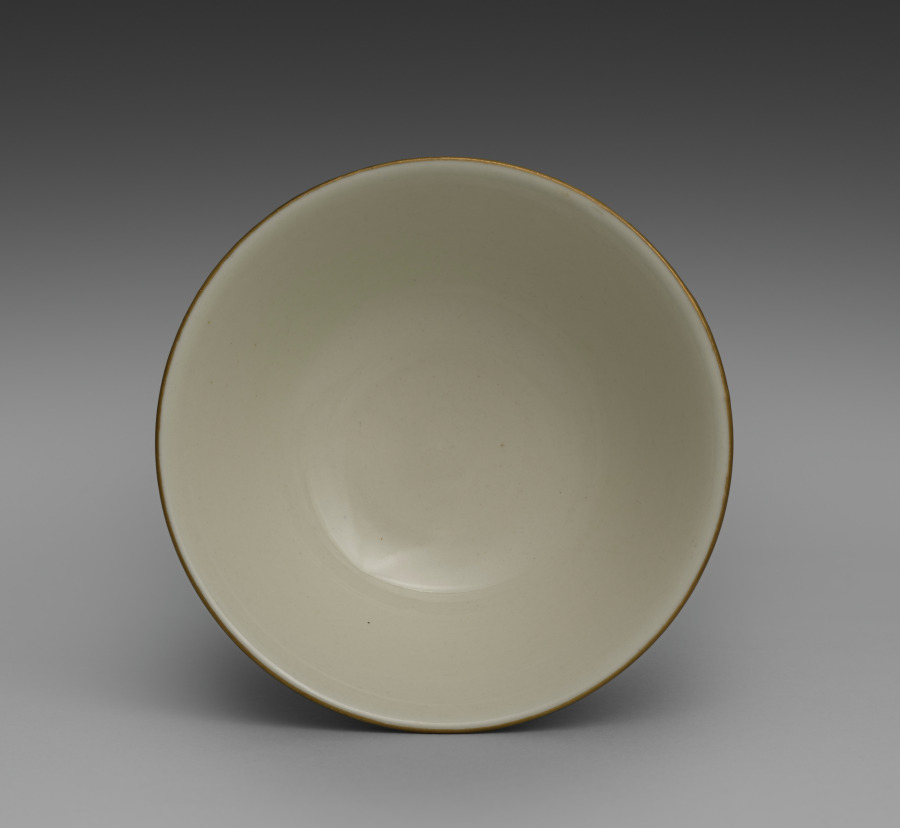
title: Bowl from Dining Set with Plum Blossoms and Cracked-Ice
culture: Japan, Meiji period (1868–1912)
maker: Seifū Yohei II (Japanese, 1844–1878)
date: c. 1875–78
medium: Porcelain with molded designs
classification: Ceramic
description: Each item in this set has a delicate low-relief design of flowering plum branches over scattered, intersecting lines meant to resemble the cracked-ice surface of a frozen body of water and is signed on the base in gold pigment. While Yohei II produced many fine works in underglaze blue, like those produced by Kiyomizu Shichibei, he also made works in quite different styles later in his career, from the early 1870 s. In 1873, he was appointed purveyor to the Industrial Center of Kyoto Prefecture, a designation associated with Kyoto’s efforts to reach an international market through the port of Kobe; and from 1875 until his death, he was involved in national-level projects to present Japanese ceramics across the world. It was during this period that Yohei III was apprenticed to Yohei II, and it has been suggested that this set may in fact be an early example of Yohei III’s work, which he signed with his teacher’s name. Decorated with flowers resembling Japanese textile motifs, the set calls to mind the design of Yohei II’s pair of vases with plum blossoms in the Victoria and Albert Museum. Here, the elaborate trees created for a formal public exhibition setting have been translated into the approachable blossoms of the genteel domestic environment. While the designs are consistent across the pieces, each raised flower petal and pistil and each incised line in the ice was done by hand, so the cups, bowls, and dishes are similar yet unique. The bottoms of two boxes once identified the set’s owner, but the information has been deliberately obscured with black ink. However, inscriptions still visible appear to indicate two occasions, once at the end of July 1886 , and once again in June 1916 , when parts of the set were requested from Hokura in Niigata Prefecture. The location corresponds to a neighborhood in the present-day city of Jōetsu. The surname Tsuji 辻 also appears on a paper tag affixed to one of the box cloths. Future research may possibly reveal more about their provenance. A vase by Yohei III in a private collection combines the formal grandeur of the Yohei II vases in the Victoria and Albert Museum with the gentler design of this dining set, placing flowering plum trees against soft, scalloped-edge clouds resembling those in golden screens.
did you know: The dining wares have a creamy white coloration that the four boxes containing them identify as Korean in style.